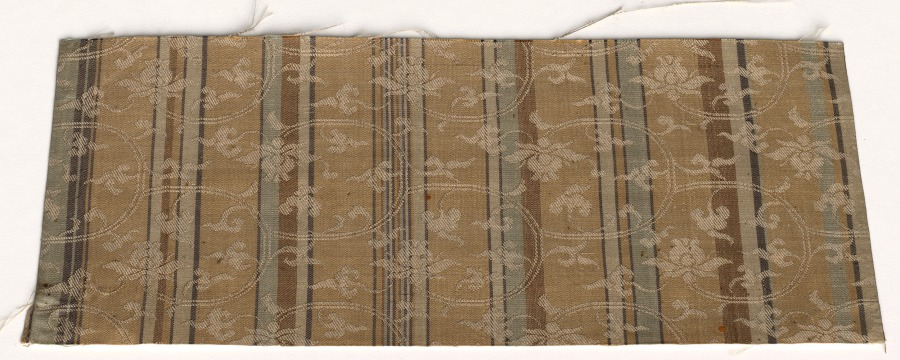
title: Textile Fragment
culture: Japan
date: 1800s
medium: silk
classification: Textile